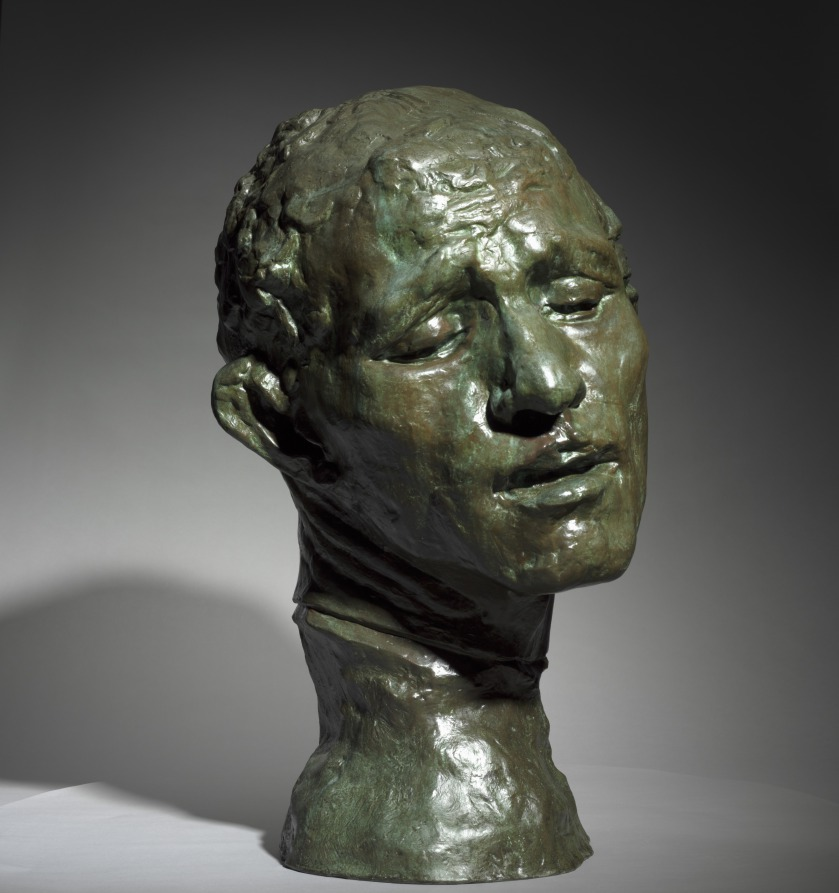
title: Heroic Head of Pierre de Wissant, One of the Burghers of Calais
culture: France, 19th century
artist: Auguste Rodin (French, 1840–1917)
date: 1886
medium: bronze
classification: Sculpture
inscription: inscribed at neck, left: A.Rodin; inscribed lower back: Alexis Rudier/Fondeur-Paris.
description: This sculpture depicts one of the figures in Rodin’s large public monument The Burghers of Calais (1884–89), featuring six French men who volunteered to be taken prisoner by the English in exchange for lifting the siege of Calais during the Hundred Years War (1337–1453). Pierre de Wissant’s anguished expression suggests extreme mental suffering as he contemplates his expected execution. Rodin exhibited a life-size version of the figure as an independent work before completing the monument. He later made multiple versions in various sizes and media.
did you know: This sculpture depicts the head of a figure from Rodin's large public monument The Burghers of Calais (1884-89). The CMA also owns a plaster version of the head.